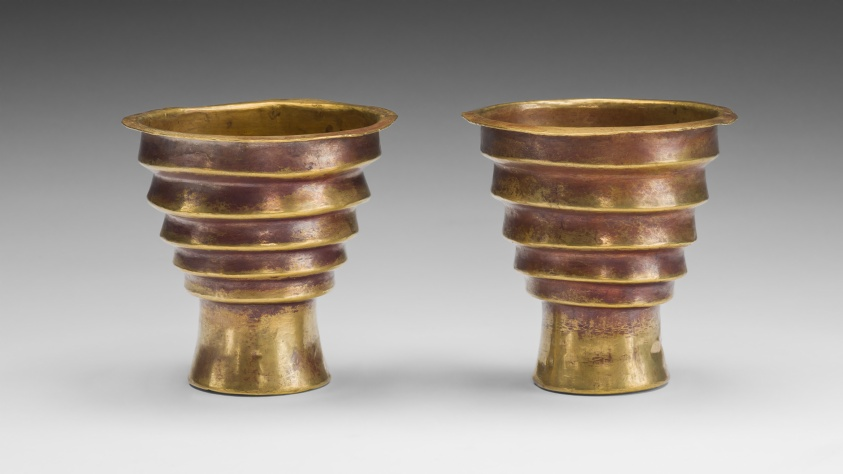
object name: Vessel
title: Pair of Beakers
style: inca, americas, andes, Arts of the Americas, andean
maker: Inca (Ica Valley, south coast, Peru)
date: 1450–1532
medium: Gold and copper alloy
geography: Peruvian South Coast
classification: drinking vessel; gold; copper alloy; art of the americas; vessel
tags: offering, stepped motif, ritual objects